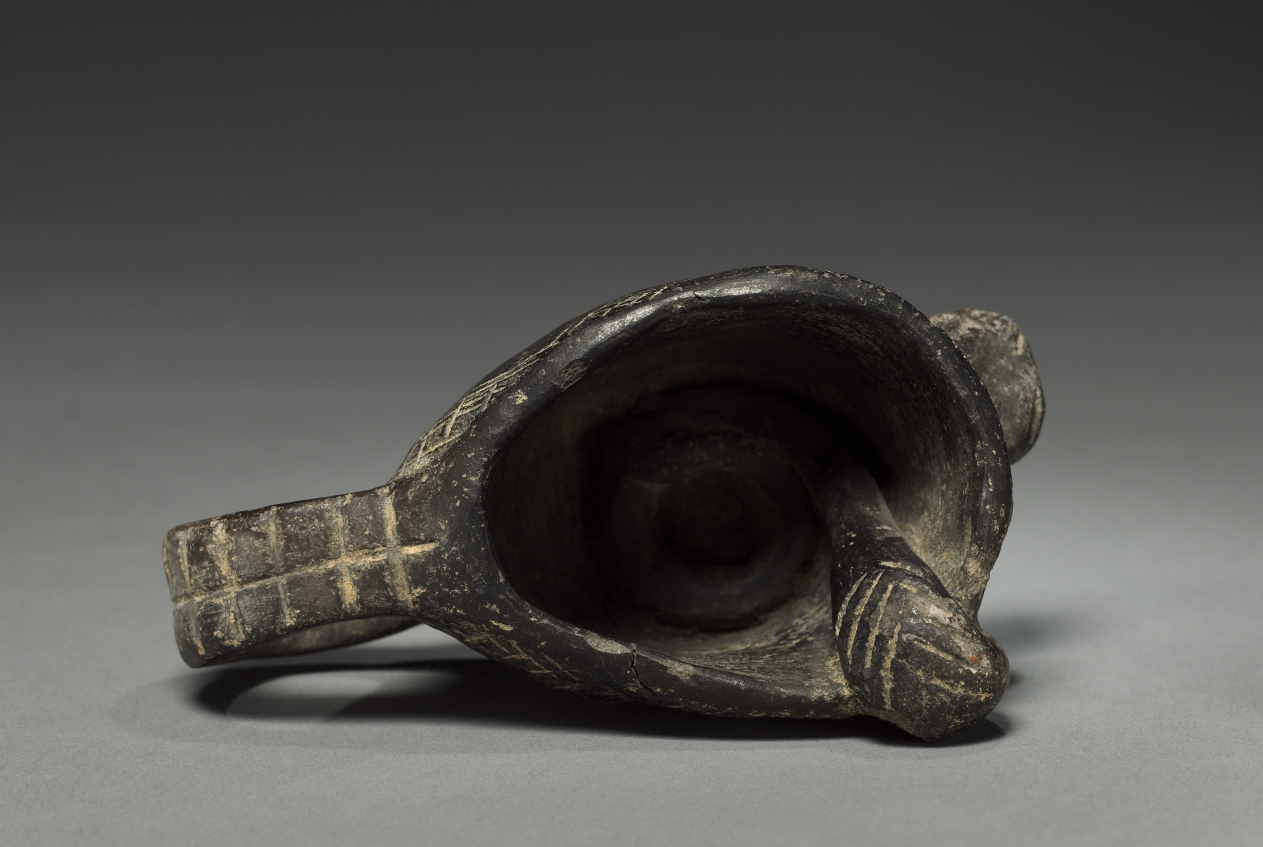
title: Dish with Handle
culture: Colombia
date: before 1921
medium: pottery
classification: Ceramic